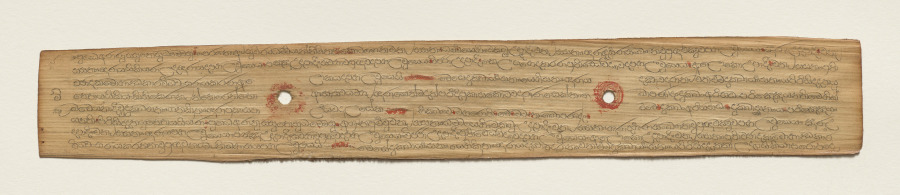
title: Leaf from a Buddhist Manuscript (recto)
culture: Sri Lanka, Singhalese, Late 17th century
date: c. 1700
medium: fiber paper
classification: Manuscript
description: Palm leaf material is still used for manuscripts in Sri Lanka. The palm leaves are prepared first by boiling them, drying them in the sun, and then rubbing them with oils. Scribes then use a metal stylus to incise the text. Then charcoal powder is wiped across the pages, filling in only the inscribed lines.